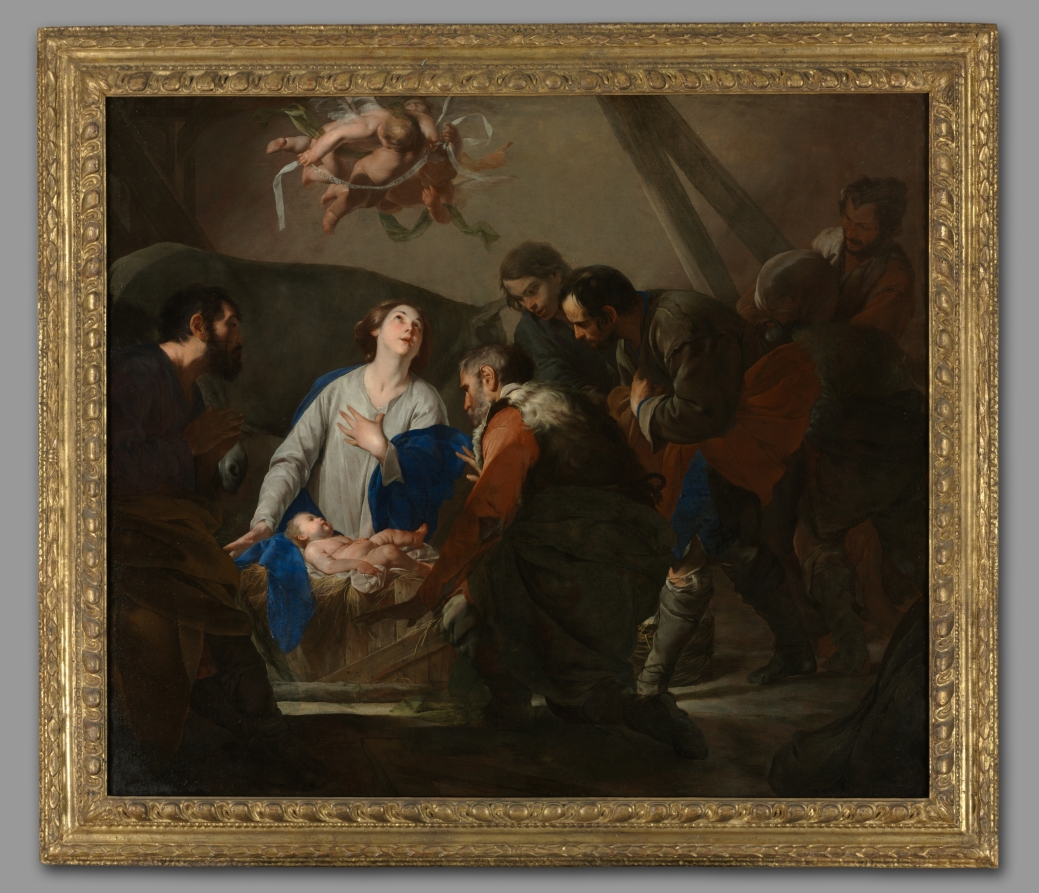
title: Adoration of the Shepherds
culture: Italy, 17th century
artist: Bernardo Cavallino (Italian, 1616–1656)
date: c. 1650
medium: oil on canvas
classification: Painting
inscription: Signed left on ox: "BC [monogram]"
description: Cavallino worked in Naples where he was not well known during his lifetime, but was alert to the work of contemporaries whose innovations he transformed with extraordinary delicacy and charm. The adoration of the shepherds is a traditional subject, but here Cavallino shows it in a new light. The focus is on Mary, indicating that she alone is aware of the angels who flutter above with ribbons proclaiming Gloria in Excelsis Deo (Glory to God in the highest). Joseph and the shepherds stolidly regard the child, but the sweetness of Mary's expression simultaneously reveals her love, pride, and humility.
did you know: The artist signed this painting with his monogram “BC” on the rump of the ox.